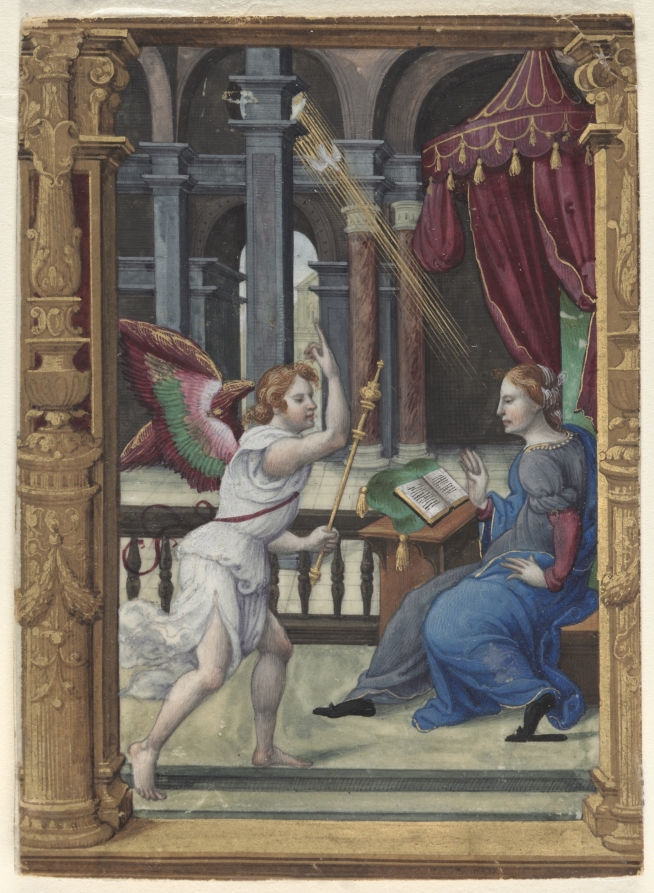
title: The Annunciation (Matins, Office of the Virgin): Leaf from a Book of Hours (1 of 3 Excised Leaves)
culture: France, Paris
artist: Noël Bellemare (French, d. 1546)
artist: and The 1520s Hours Workshop (French)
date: c. 1530–35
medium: ink, tempera, and liquid gold on vellum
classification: Manuscript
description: Unusual in French manuscript painting of the period, fuchsia pinks and bright acid greens characterize the painting’s palette. The figures are set in the foreground of the miniature and enclosed within a "Fontainebleau"-style architectural frame. The 1520s Hours Workshop primarily produced jewel-like luxury books of hours for a wealthy clientele. Evidence points to Paris as the site of the workshop's activity under the direction of the Antwerp-born miniaturist Noël Bellemare (died 1546).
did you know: Books of hours were often purchased as luxury objects in order to reflect the owner’s status, wealth, and taste.